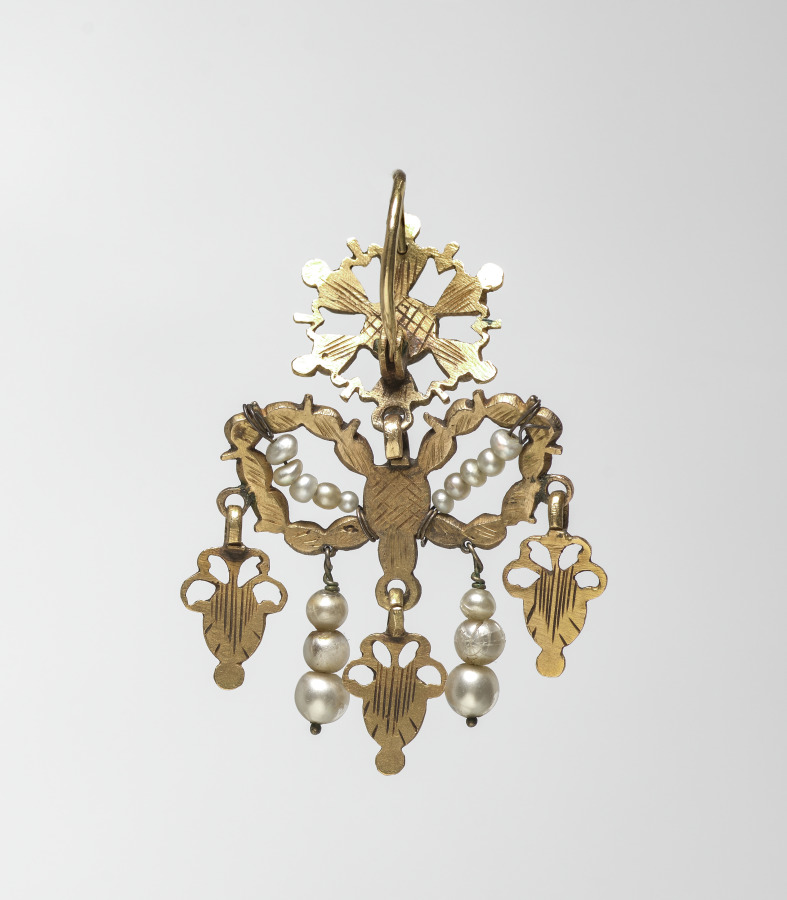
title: Woman's Costume (Earring)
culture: Italy, 19th century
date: 1800s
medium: gold and jewels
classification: Jewelry